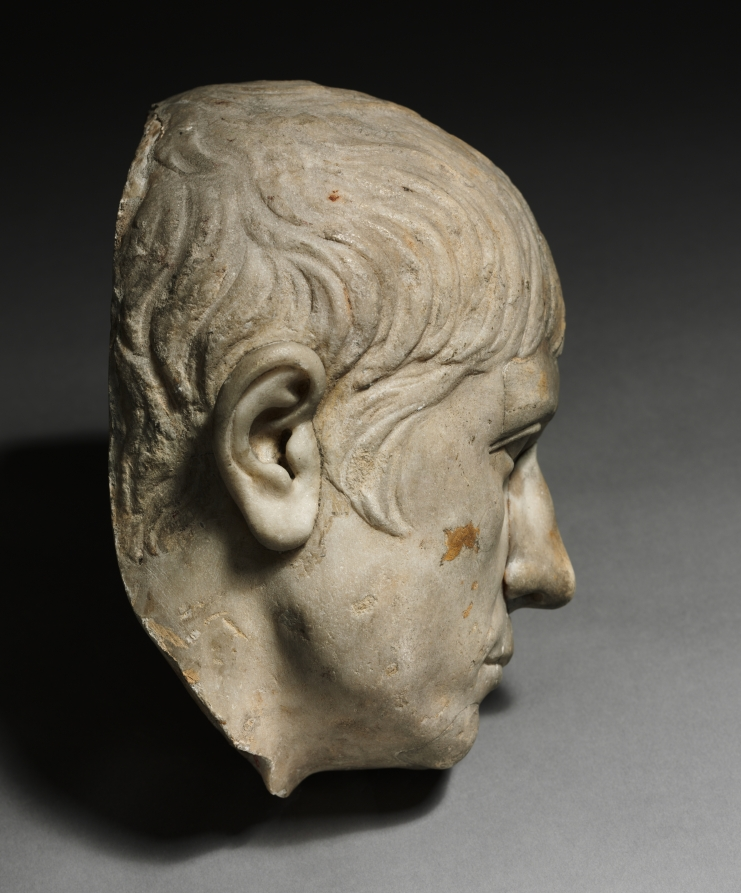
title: Bust of a Man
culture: Italy, Face: Roman, early 2nd century or later; Body: 16th century or later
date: Face: early 2nd century or later. Body: 1500s or later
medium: marble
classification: Sculpture